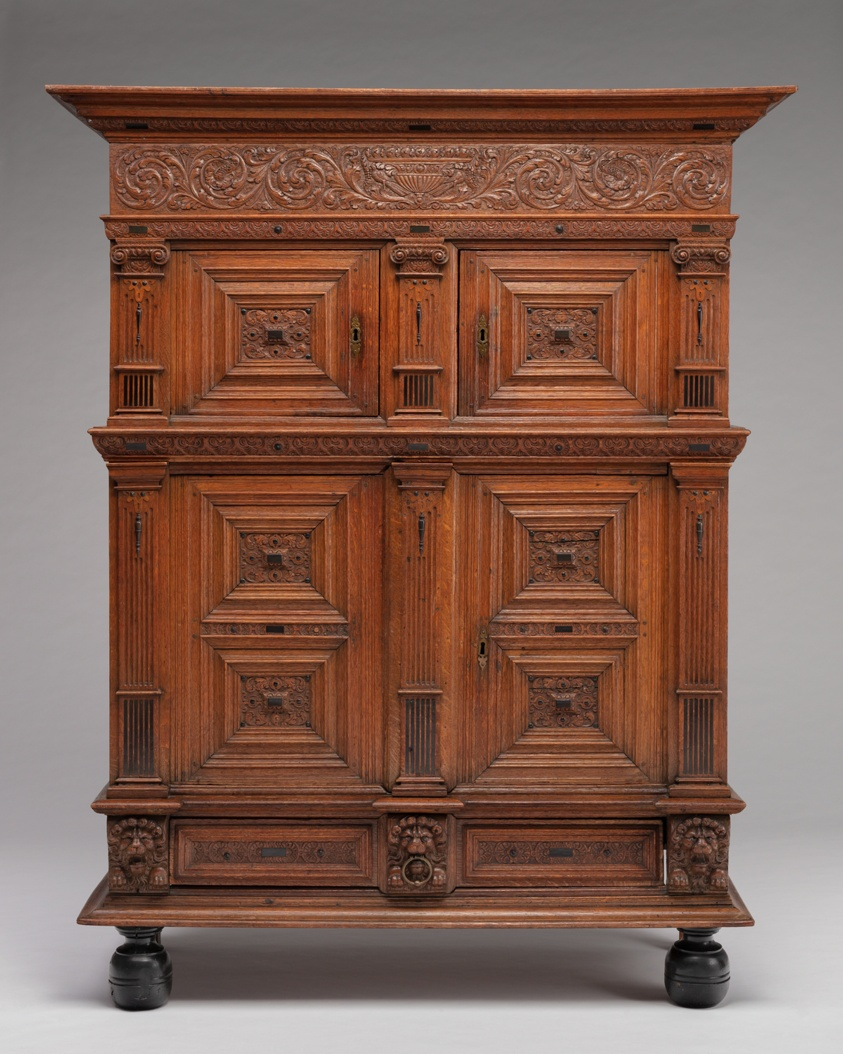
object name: Furniture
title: Linen Cupboard (Kast)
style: Baroque, Mannerism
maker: The Netherlands, probably Amsterdam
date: 1630/50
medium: Oak, pearwood, hardwood, paint, iron, and brass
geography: Netherlands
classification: furniture; decorative arts; functional object; furnishings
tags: lions, animals, architecture